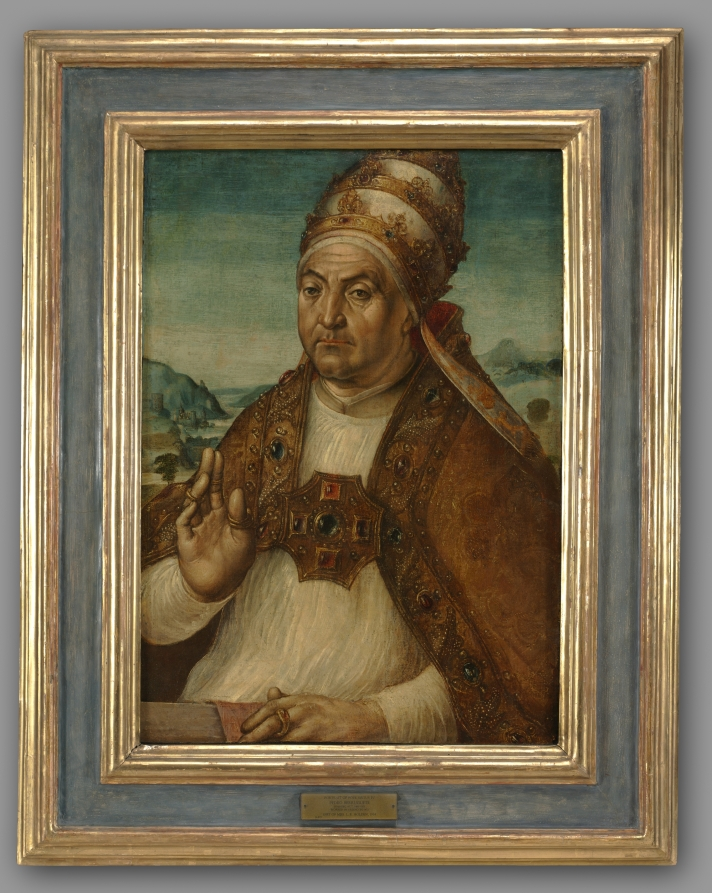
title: Portrait of Pope Sixtus IV della Rovere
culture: Spain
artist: Pedro Berruguete (Castilian, c. 1445/1450-1503)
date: c. 1476–82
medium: oil on wood, transferred to canvas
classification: Painting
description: Spanish artist Pedro Berruguete spent a decade in Italy in the 1470s and 1480s, including a period in Rome during which he painted Pope Sixtus IV della Rovere from life. Here, the pope raises his hand in a gesture of benediction, blessing the viewer while meeting their gaze. Using white highlights to represent the glittering luminosity of the bejeweled garments, Berruguete accentuates Sixtus IV’s sumptuous attire, including the triregnum, or ceremonial triple crown and symbol of the papacy.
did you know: James Jackson Jarves (1818–1888)—famed art critic and one of the first Americans to amass a collection of medieval, Renaissance, Mannerist, and Baroque paintings from Italy—owned this painting in the late 19th century.